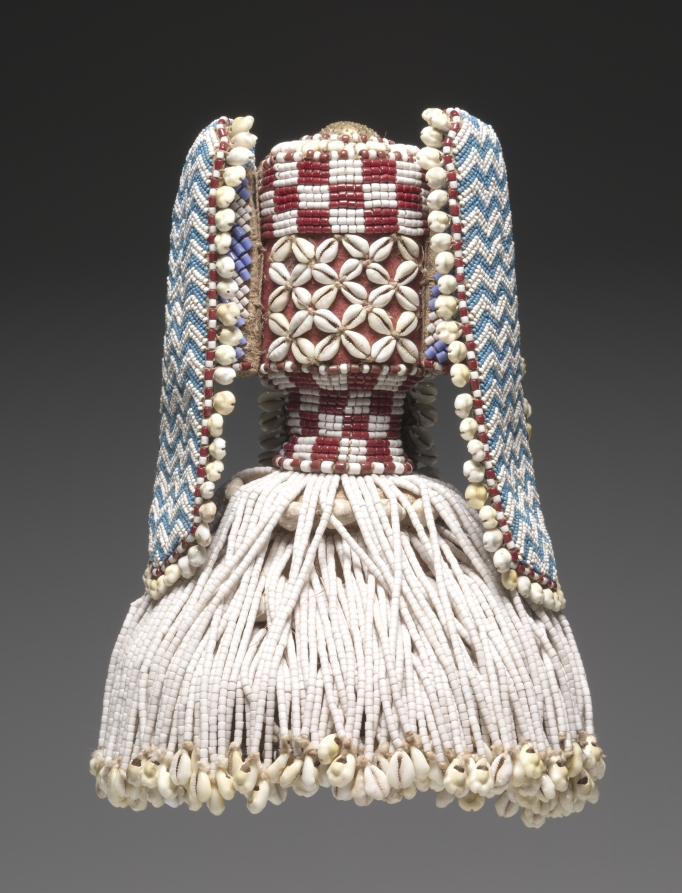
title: Hat (Kalyeem)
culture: Africa, Central Africa, Democratic Republic of the Congo, Kuba-style maker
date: possibly early 1900s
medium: Raffia, glass beads, cowrie shells, cloth (including wool), thread, and copper alloy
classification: Garment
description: Kuba men (and some women) show their title and status with hats and hat accessories. The male owner of this heavily beaded and shell-covered hat (kalyeem) had a senior title. A simple coiled basketry hat forms its foundation (similar to 1915.465). Fabric panels stitched with zig-zagging white and blue beads edged in cowries hang from the top. White bead strands with cowrie shells flow downward, pushed out over the forehead by a large brim. Technically and aesthetically, beaded Kuba hats and masks have much in common; artists specializing in beading techniques had the skills to make both, using imported beads and shells.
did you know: The imported beads and shells on this hat were expensive, so they showed off its wearers' wealth.